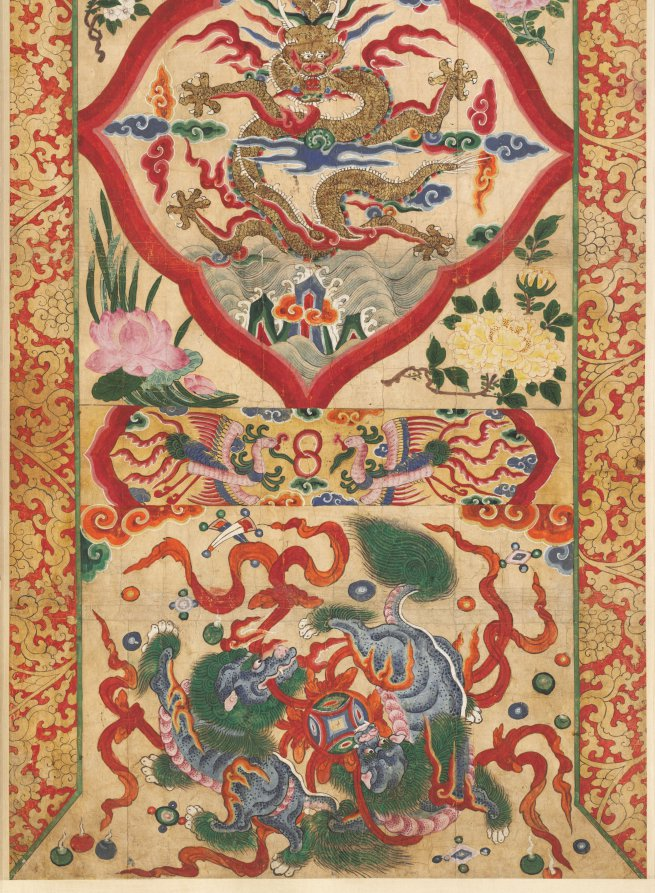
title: Painted Panel of Character "Dragon"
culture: Korea, Joseon dynasty (1392–1910)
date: early 1900s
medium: hanging scroll, ink and color on paper; unmounted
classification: Painting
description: This set of four colorful hanging scrolls may have been used in an outdoor Buddhist ritual to evoke heavenly blessings. Each hanging scroll bears four different characters: tiger, dragon, whistle, and recite. Traditionally, tiger and dragon belong to the four directional guards, respectively west and east.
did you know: This set of four colorful hanging scrolls may have been used in an outdoor Buddhist ritual to evoke heavenly blessings.